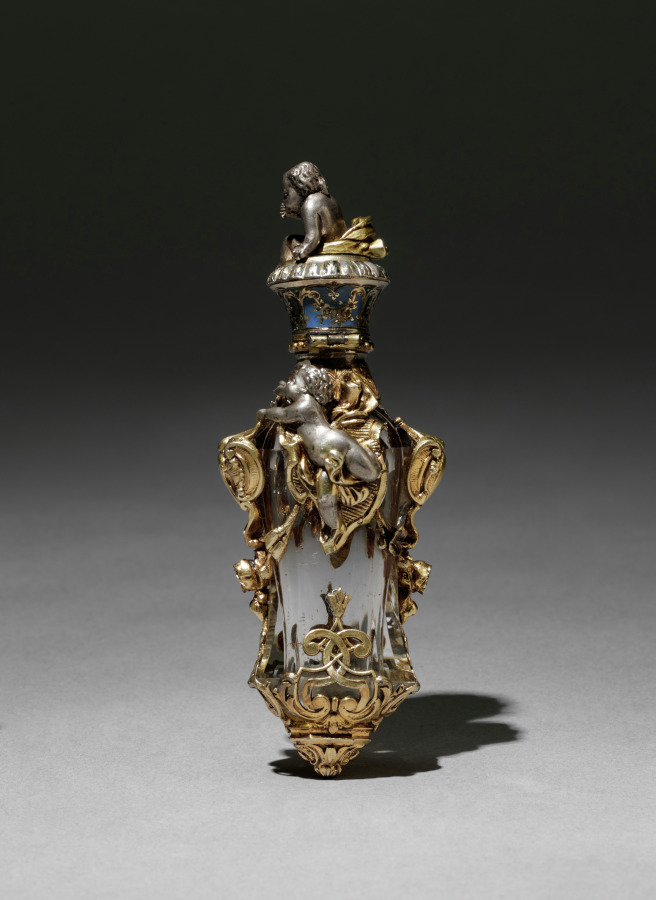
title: Scent Bottle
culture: France, 19th century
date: 1850–1870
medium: glass with enameled silver mounts, partially gilt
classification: Miscellaneous